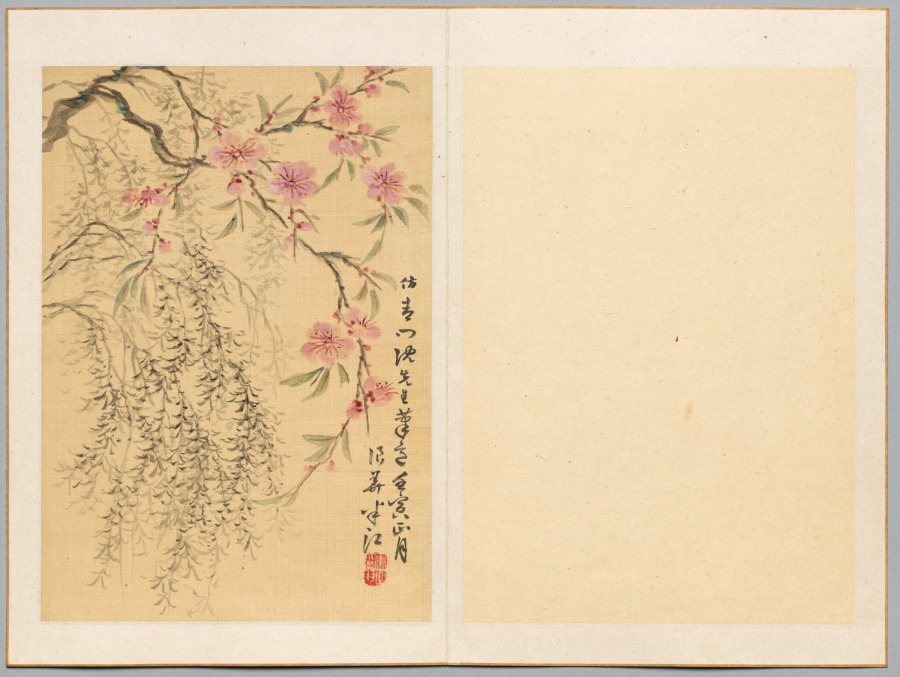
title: Peach Blossoms and Willows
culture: Japan, Edo period (1615–1868)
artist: Okada Hankō (Japanese, 1782–1845)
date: 1842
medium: leaf from a pair of folding albums; ink and color on silk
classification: Portfolio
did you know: Okada Hankō's life was marked by the loss of his library of books and paintings to a fire caused by a rebellion in his home city of Osaka.